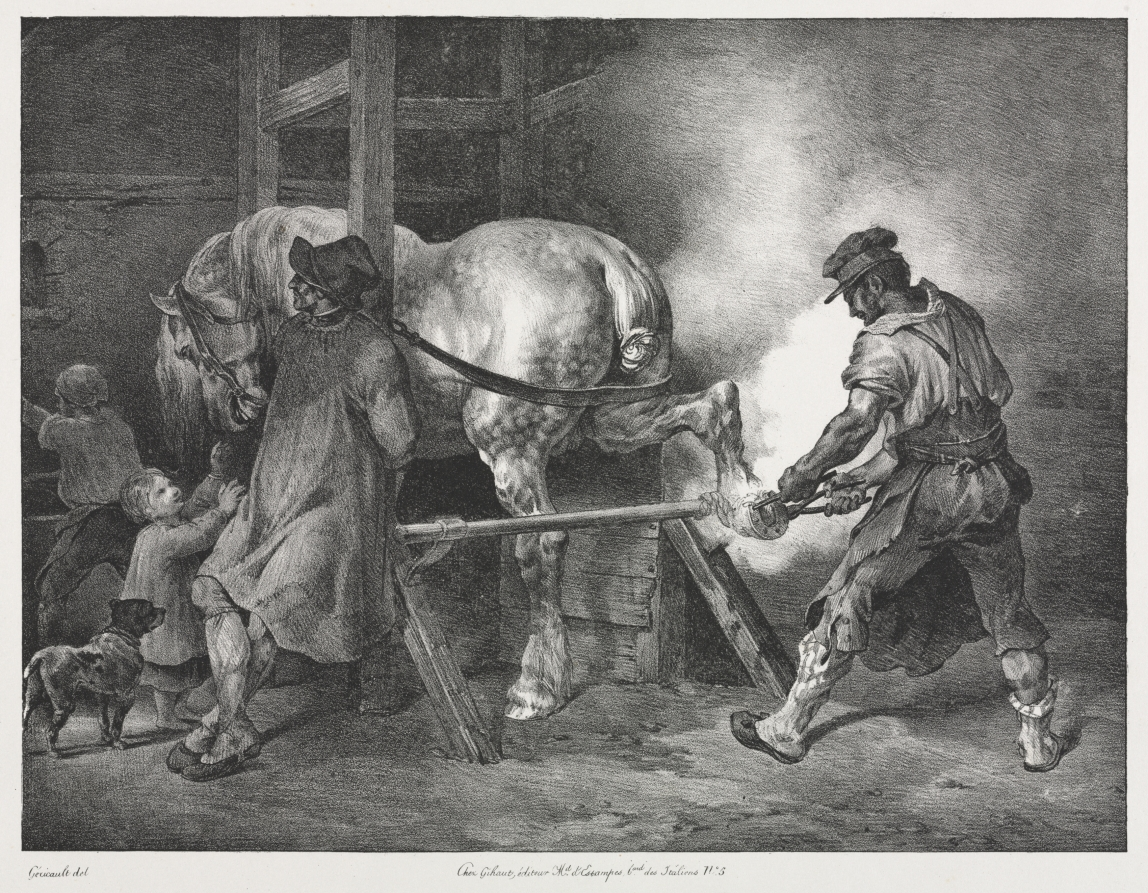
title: The Flemish Blacksmith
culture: France, 19th century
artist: Théodore Géricault (French, 1791–1824)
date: 1822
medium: lithograph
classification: Print